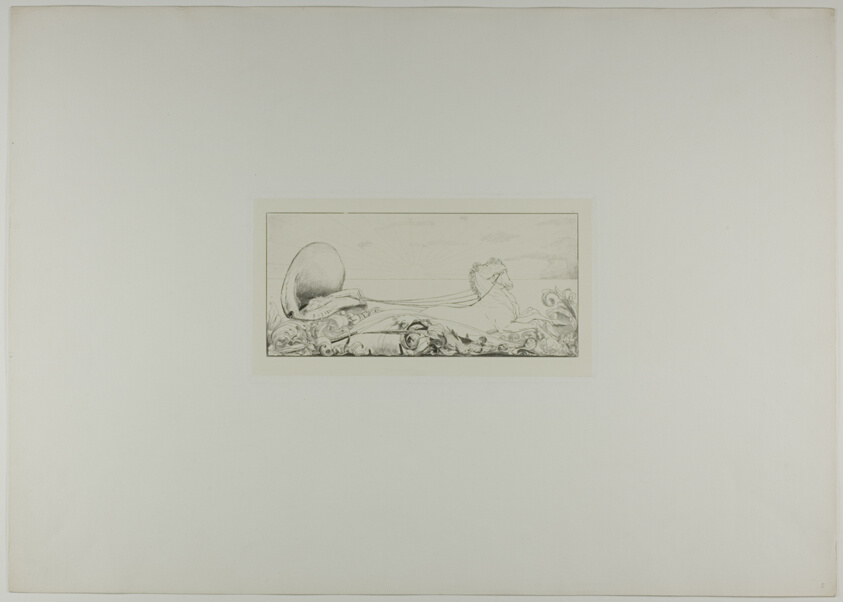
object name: Print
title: Triumph, plate five from A Glove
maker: Max Klinger (German, 1857-1920)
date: 1881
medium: Etching on ivory chine collé on off-white wove paper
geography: Germany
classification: etching; print; prints and drawing